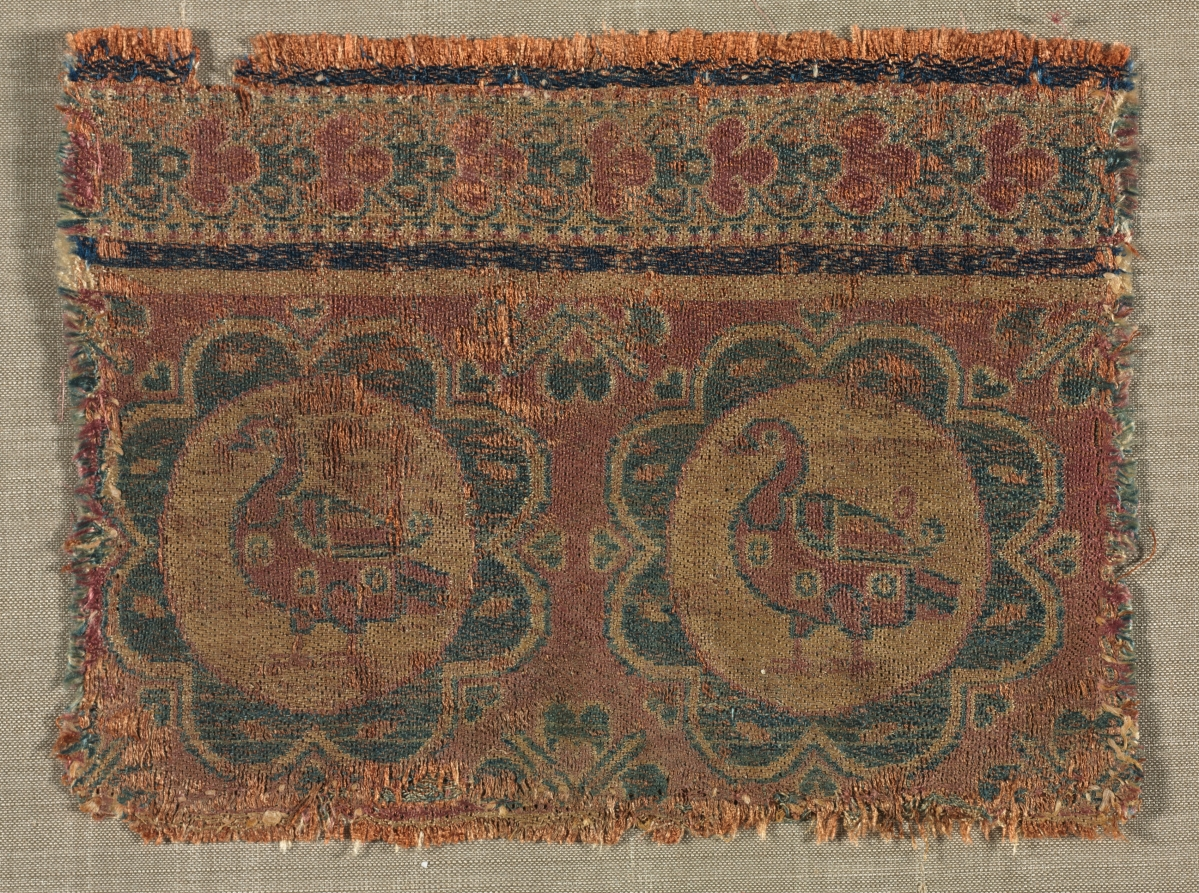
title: Silk fragment with roundels of ducks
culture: Iran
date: 600s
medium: samite: silk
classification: Textile